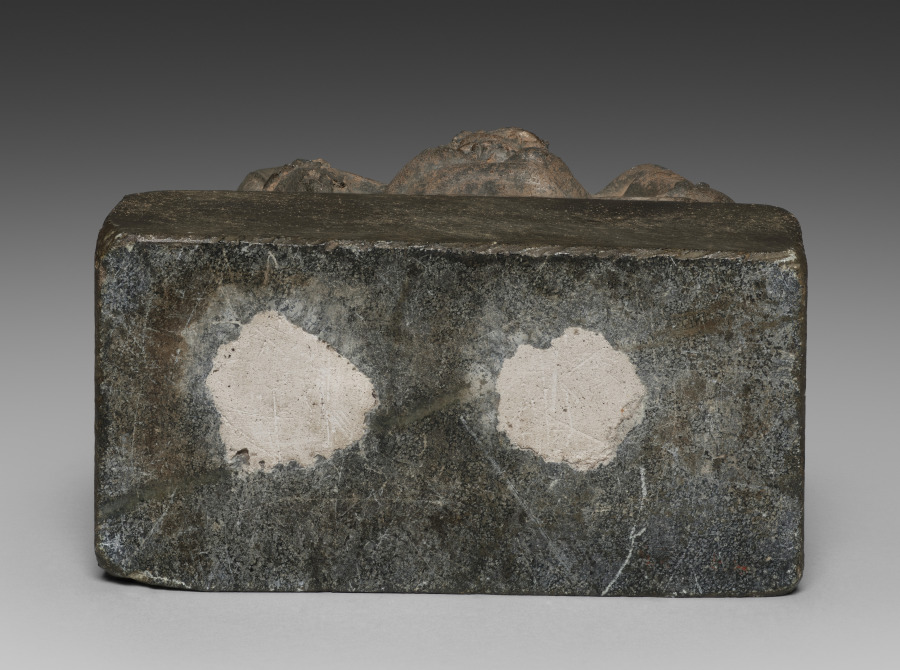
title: Winged Atlas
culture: Pakistan, Gandhara, Kushan period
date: c. 100s–200s CE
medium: gray schist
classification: Sculpture